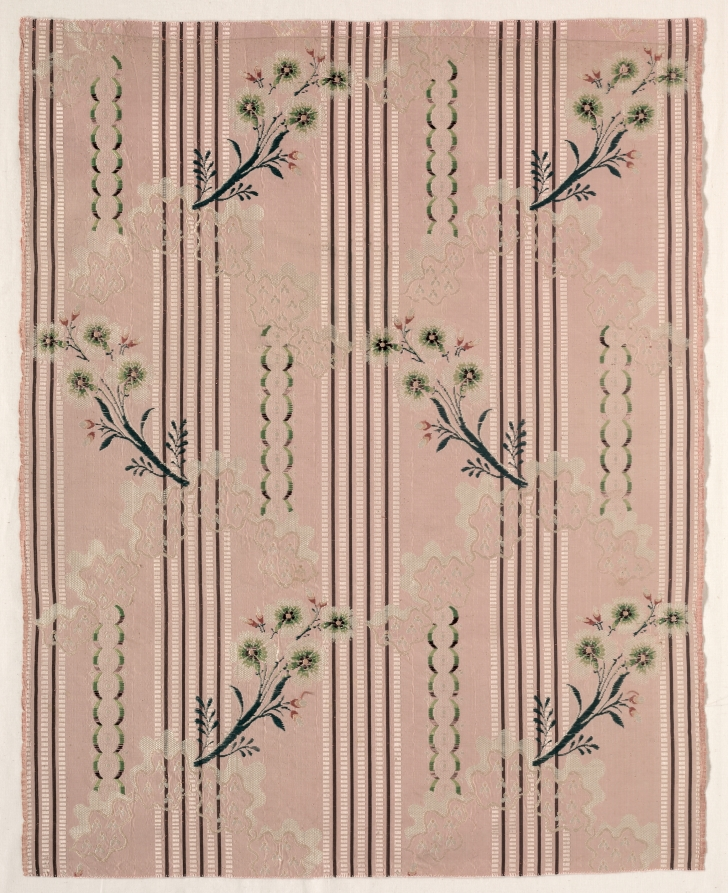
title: Length of Textile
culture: France, 18th century, Period of Louis XVI (1774-1793)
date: 1774–1793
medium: brocade, silk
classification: Textile